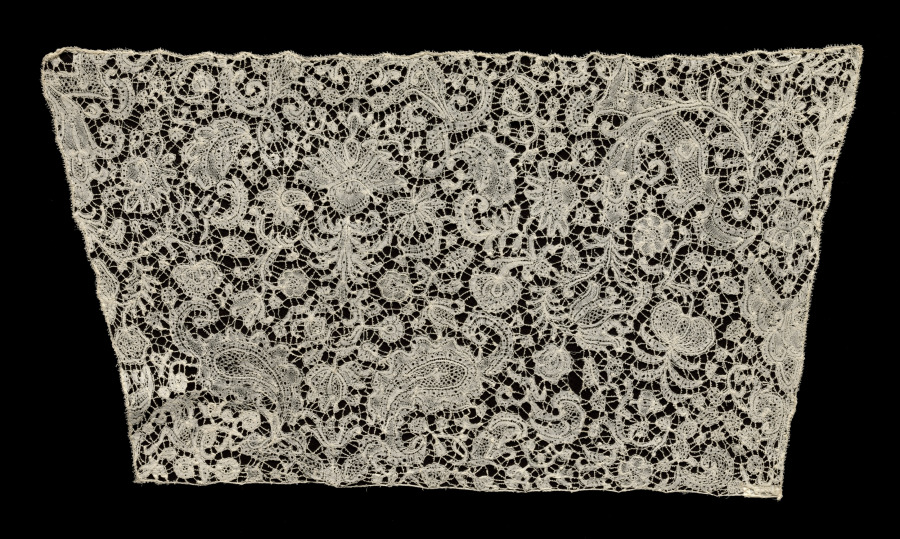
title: Lace Panel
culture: Flanders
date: 1680s–90s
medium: linen: bobbin lace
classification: Lace